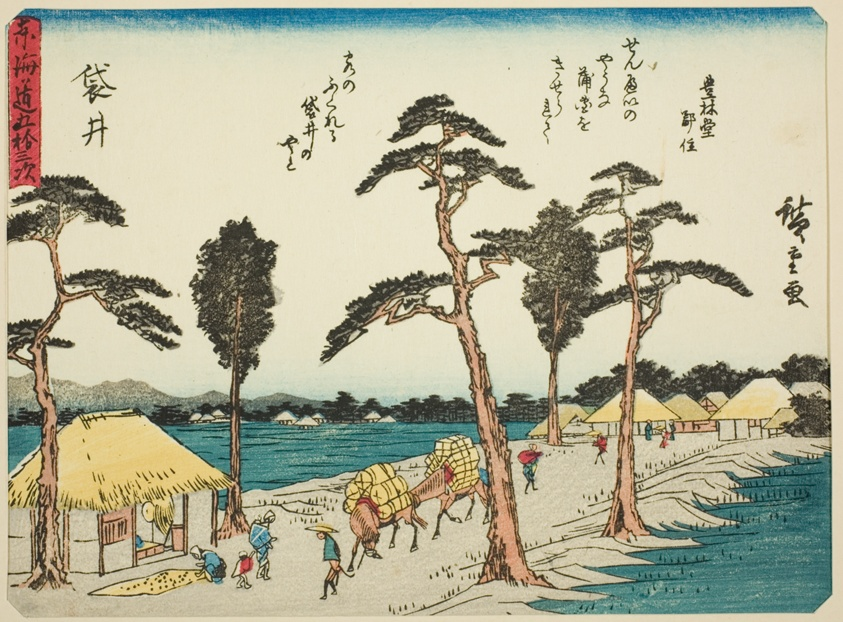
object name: Print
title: Fukuroi, from the series "Fifty-three Stations of the Tokaido (Tokaido gojusan tsugi)," also known as the Tokaido with Poem (Kyoka iri Tokaido)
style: Japanese (culture or style)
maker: Utagawa Hiroshige 歌川 広重; Japanese, 1797-1858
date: c. 1837/42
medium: Color woodblock print; chuban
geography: Japan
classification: woodblock print; print; asian art